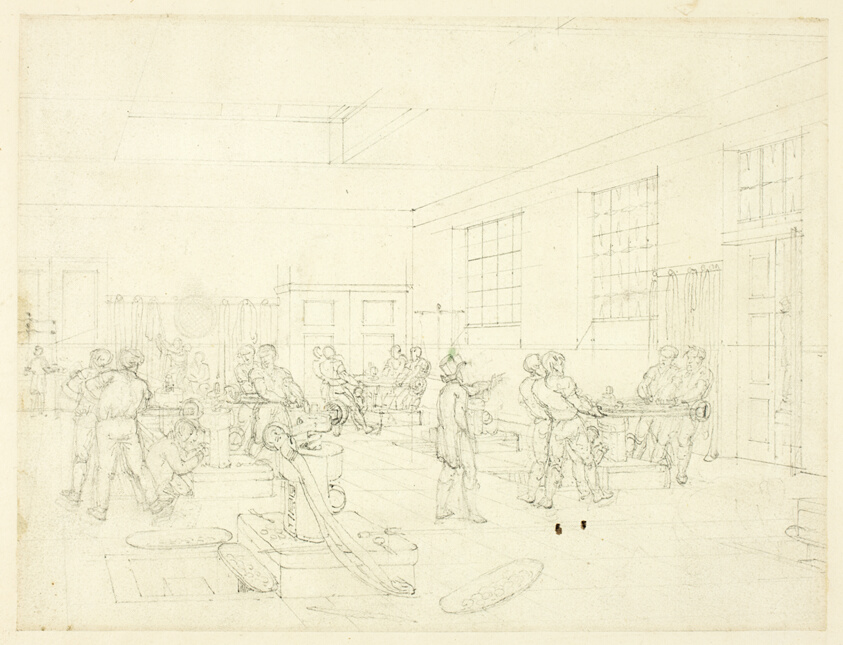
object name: Drawing and Watercolor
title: Study for The Mint, from Microcosm of London (recto); Sketch of Courtyard (verso)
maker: Augustus Charles Pugin (English, born France, 1762-1832); Thomas Rowlandson (English, 1756-1827)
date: c. 1809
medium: Graphite (recto and verso) on ivory wove paper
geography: England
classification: graphite; drawings (visual works); prints and drawing